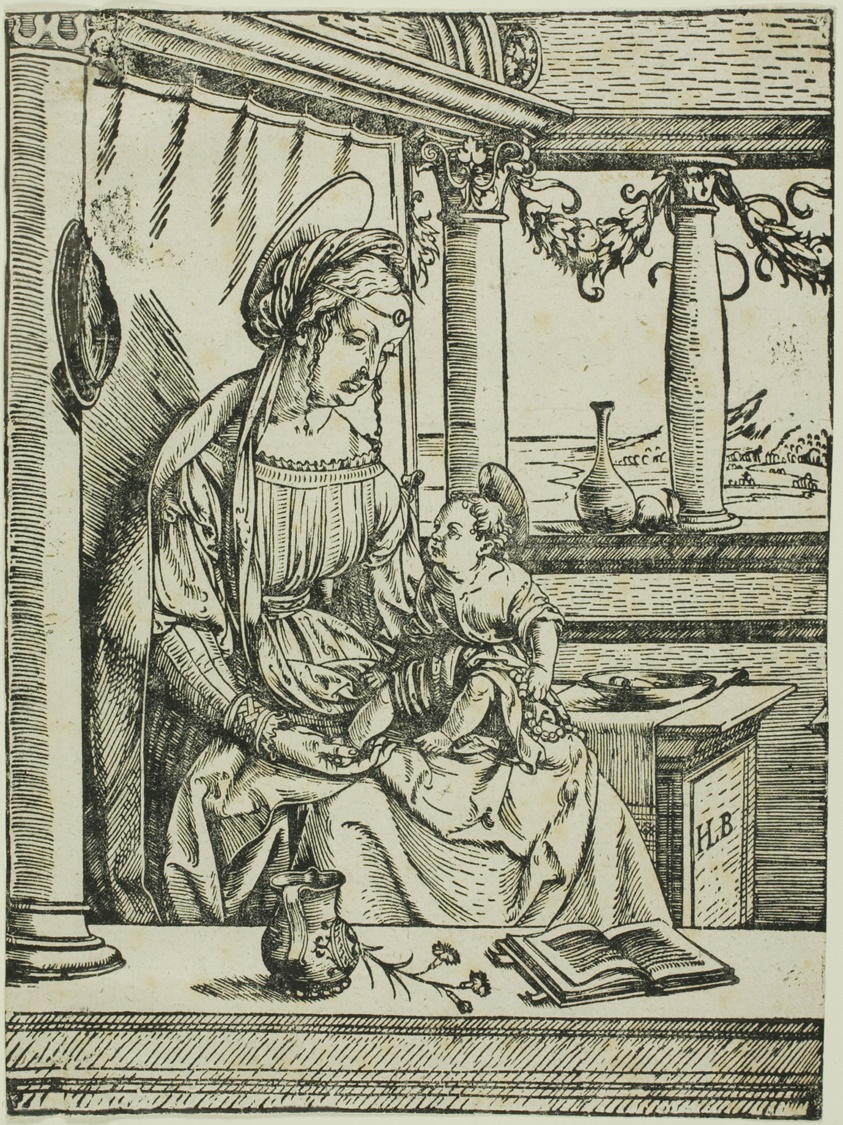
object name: Print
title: The Virgin and Child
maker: Hans Burgkmair, the elder (German, 1473-1531)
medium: Woodcut on paper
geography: Germany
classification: woodcut; print; prints and drawing